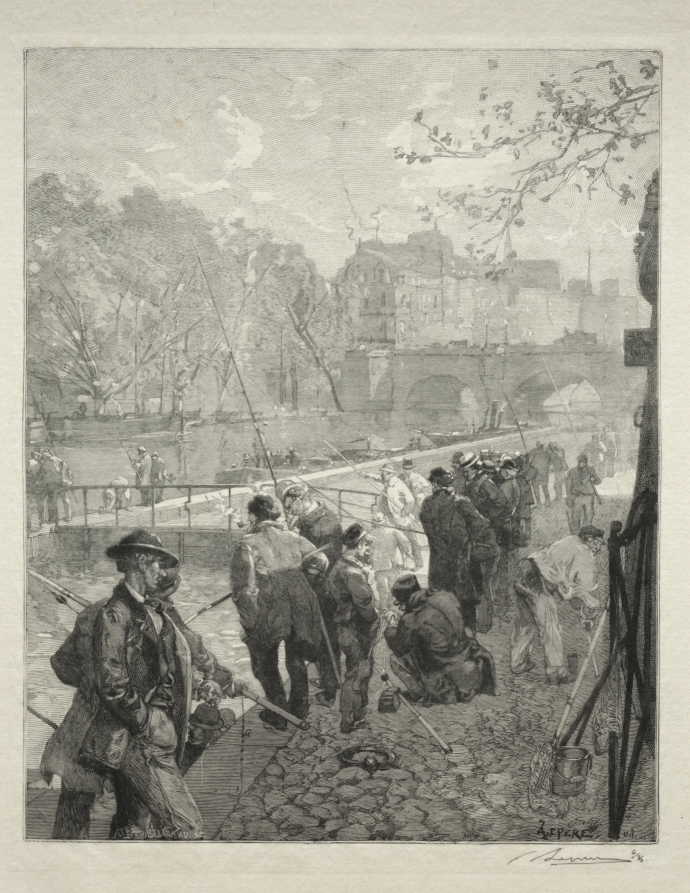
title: L'Ecluse de la Monnaie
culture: France, 19th-20th century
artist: Auguste Louis Lepère (French, 1849–1918)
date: c. 1870–1918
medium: wood engraving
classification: Print